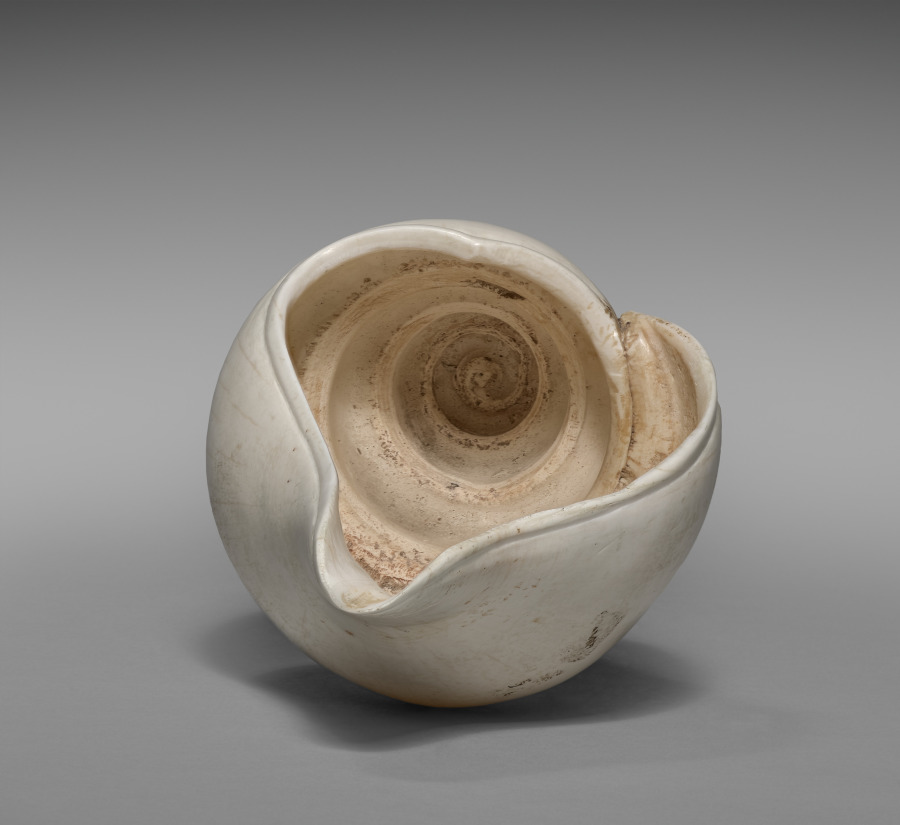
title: Ritual conch shell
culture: Cambodia, Khmer, Angkor Period, 12th-13th Century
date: 1100s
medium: shell and bronze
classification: Sculpture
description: A royal temple like Banteay Chhmar was built for performing rituals and to honor images of gods, Buddhas, and other sacred or enlightened beings for the sake of the kingdom’s protection and ongoing prosperity. Conch shells were blown at the start of rituals to make the sound corresponding to the syllable om. The dancing figure of Hevajra, a Buddhist being of enlightenment with eight heads, sixteen arms, and four legs, has been worked into the bronze embellishment of the shell. Hevajra was elevated to a prominent position in Khmer Buddhism of the Angkorian period as the standard figure denoting the practice of rituals prescribed in a text called the Hevajra-tantra. The tripod stand with three serpents is probably not original to the shell.